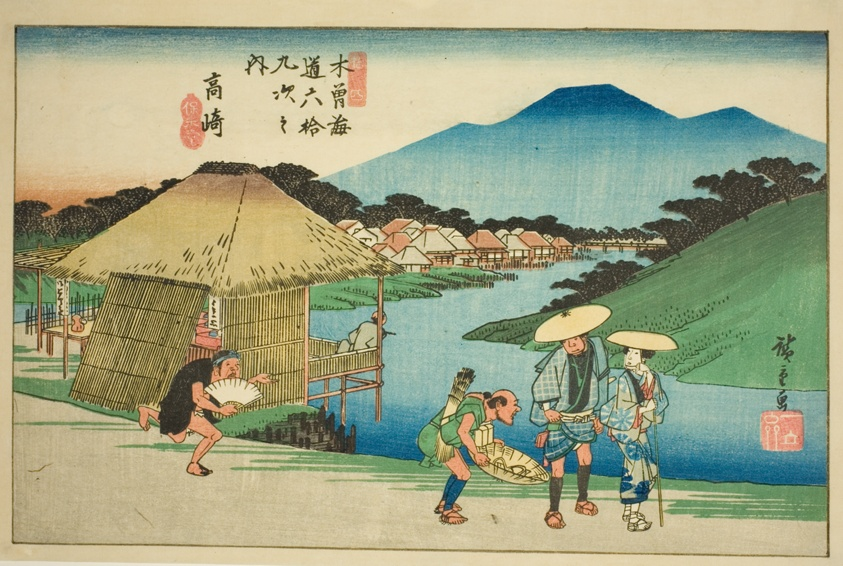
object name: Print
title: No. 14: Takasaki, from the series "Sixty-nine Stations of the Kisokaido (Kisokaido rokujukyu tsugi no uchi)"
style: Japanese (culture or style)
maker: Utagawa Hiroshige 歌川 広重; Japanese, 1797-1858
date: c. 1835/38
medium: Color woodblock print; oban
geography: Japan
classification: woodblock print; print; asian art